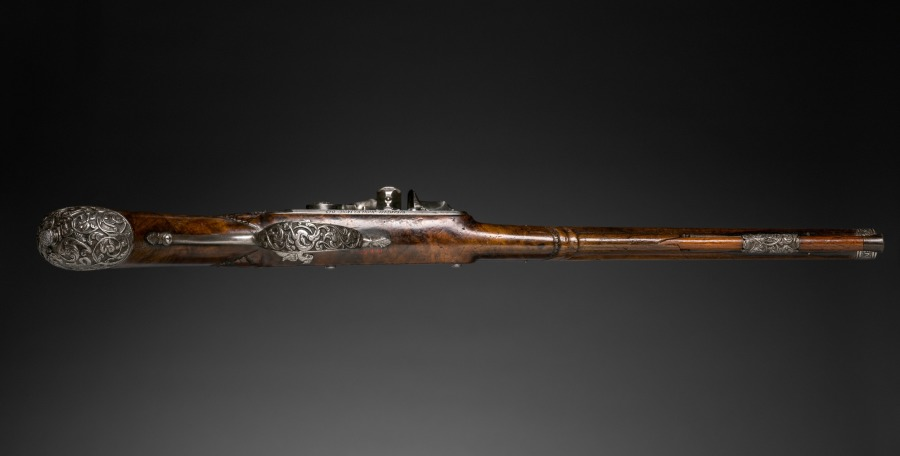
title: Flintlock Pistol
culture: Italy, Brescia, late 17th century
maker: Gio Borgognone (Italian)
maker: Lazarino Cominazzo (Italian)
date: c. 1690–1700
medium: steel, chiseled steel with walnut stock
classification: Arms and Armor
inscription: barrel signed: Lazarino Cominazzo; lockplates signed: Gio Borgognone in Bresia